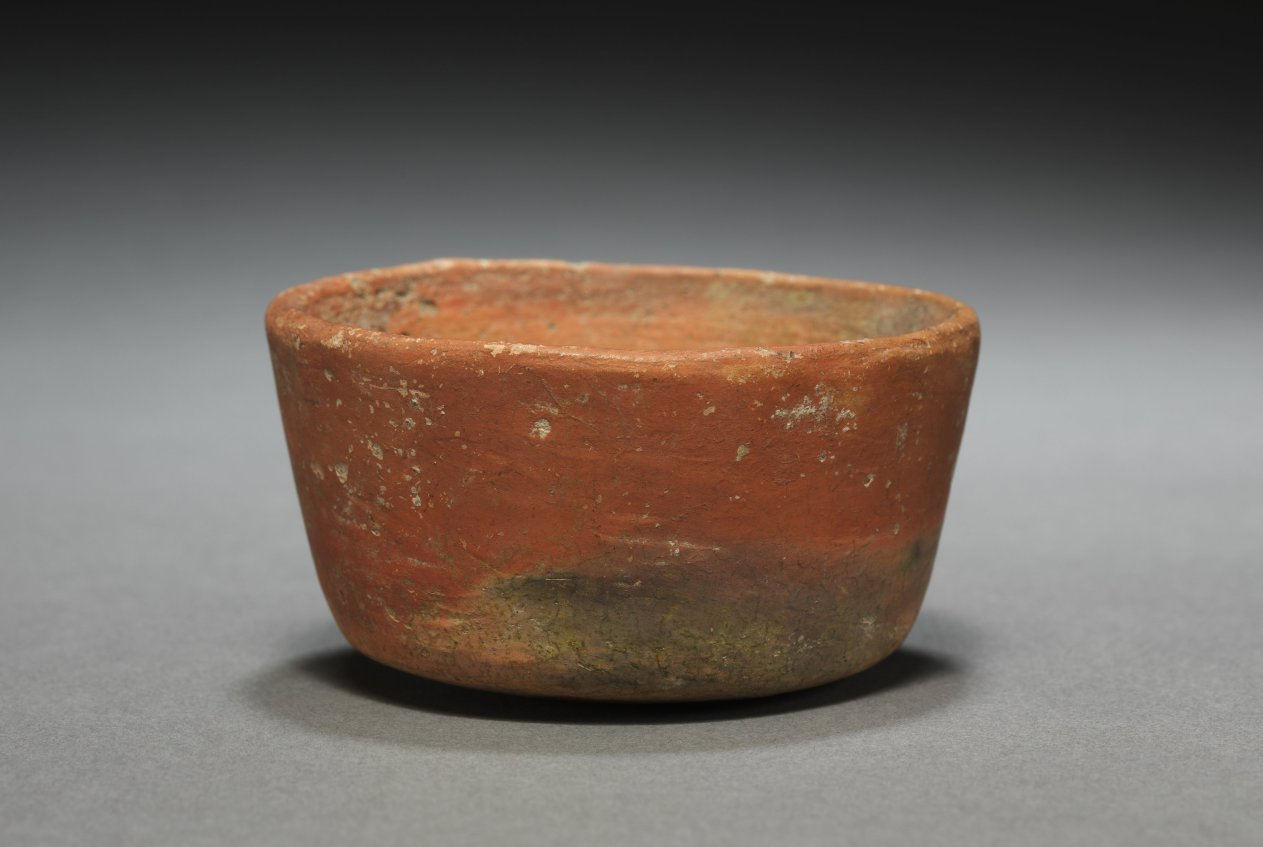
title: Cup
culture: Iran, Luristan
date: 3000–2000 BCE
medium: earthenware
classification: Ceramic